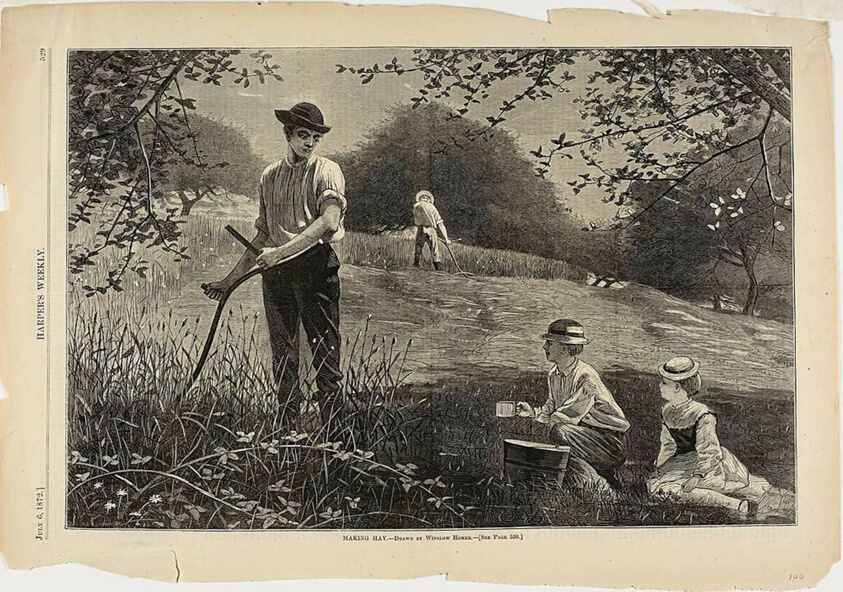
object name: Print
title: Making Hay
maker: Winslow Homer (American, 1836-1910); published by Harper's Weekly (American, 1857-1916)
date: published July 6, 1872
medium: Wood engraving on paper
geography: United States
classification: wood engraving; print; prints and drawing